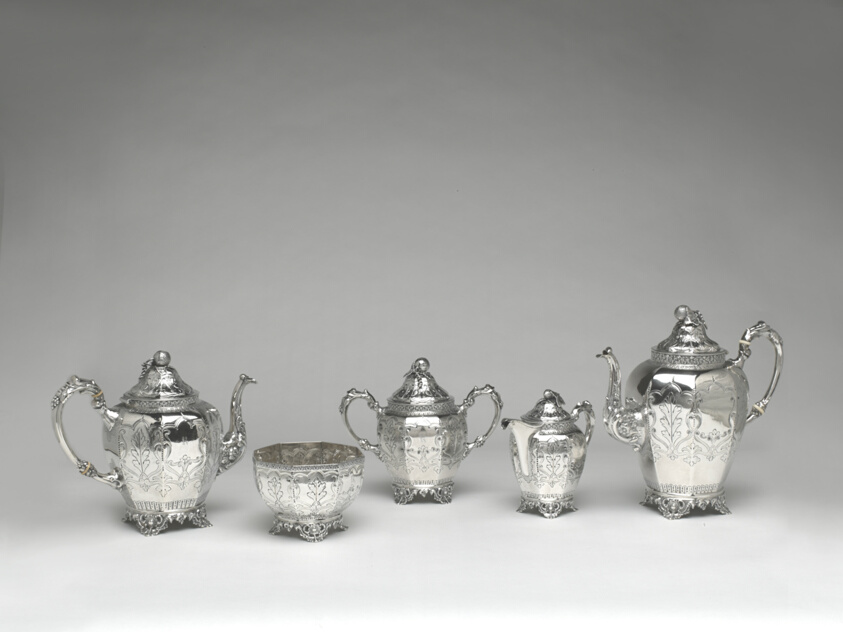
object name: Metalwork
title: Teapot (part of a set)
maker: J.T. and E.M. Edwards; American, 1852–1864; Chicago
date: 1852–64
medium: Silver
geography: Chicago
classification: teapot; silver; american decorative arts; american arts; decorative arts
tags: Chicago